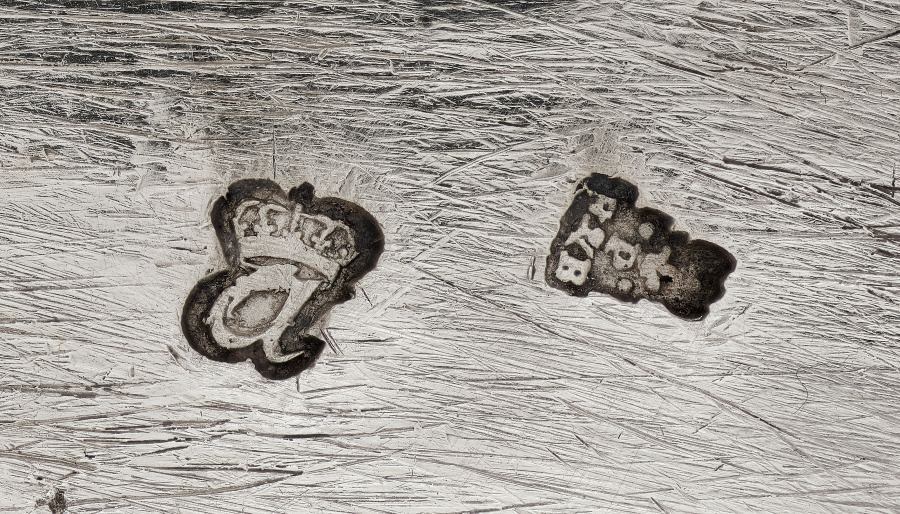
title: Tureen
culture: France, Paris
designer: Juste-Aurèle Meissonnier (French, 1695–1750)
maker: Pierre-François Bonnestrenne (French)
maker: Henry Adnet (French, 1745)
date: 1735–38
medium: silver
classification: Silver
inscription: engraved Meissonnier signature.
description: See entry for cover record 1977.182.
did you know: The langoustine, pigeon, and vegetables were cast using real examples giving the silver copies lifelike detail and appearance.